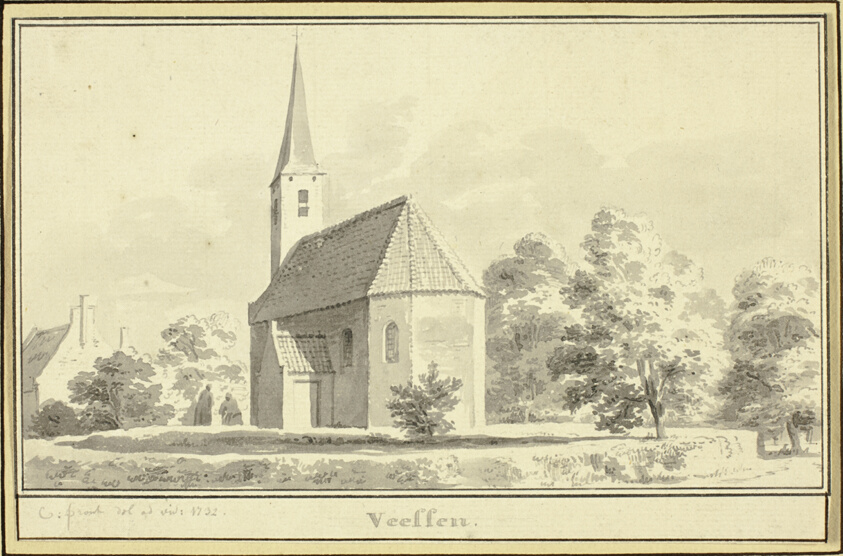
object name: Drawing and Watercolor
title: Veeffen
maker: Cornelis Pronck (Dutch, 1691-1759)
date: 1732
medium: Brush and gray wash on off-white laid paper, tipped onto yellowish ivory laid paper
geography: Netherlands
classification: ink or chalk wash; drawings (visual works); prints and drawing